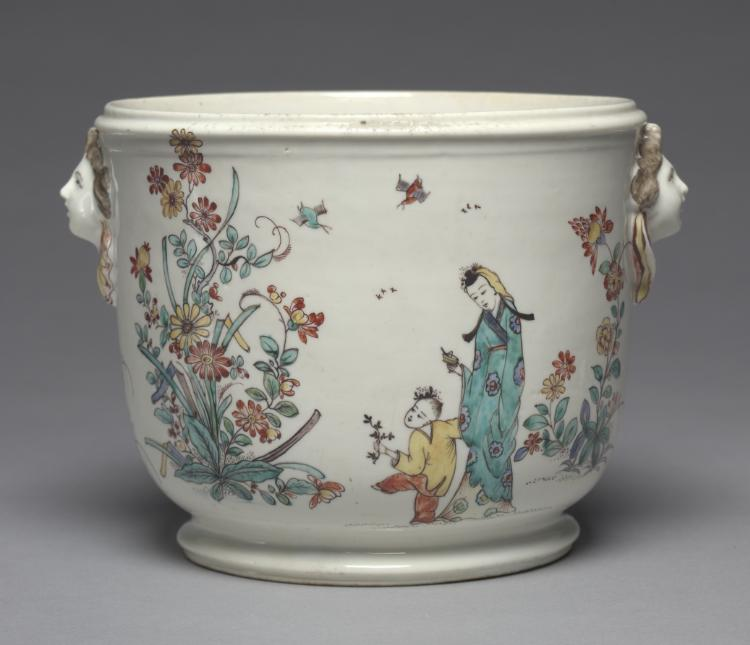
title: Bottle Cooler (seau a bouteille)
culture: France, Mennecy, 18th century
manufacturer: Mennecy- Villeroy Factory (French)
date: c. 1755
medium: Tin-glazed soft-paste porcelain with enamel decoration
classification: Ceramic